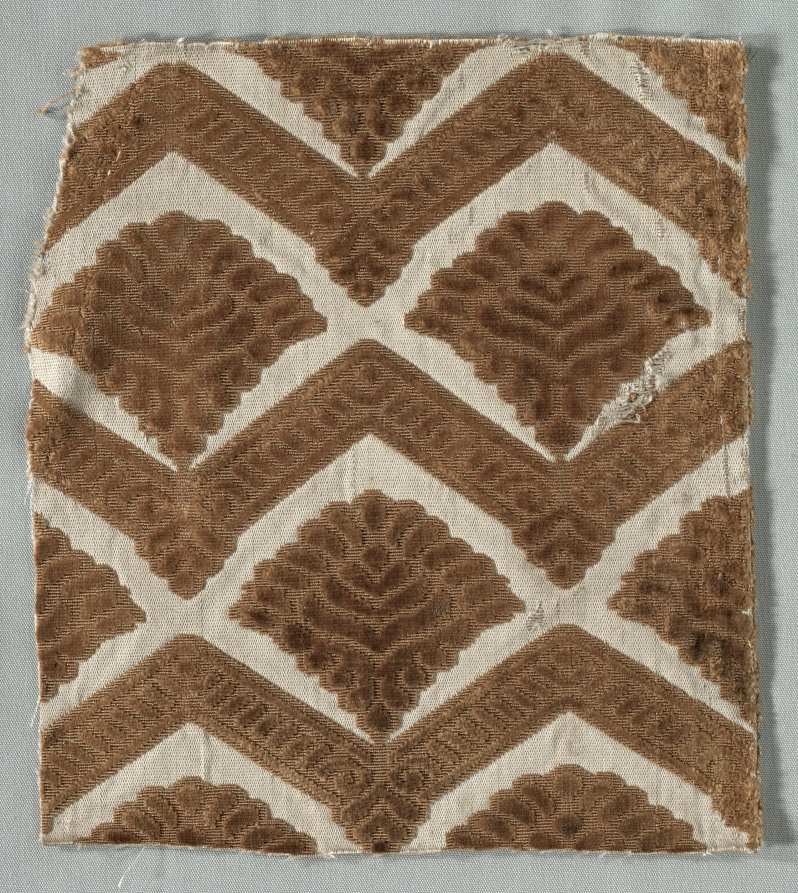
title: Velvet Fragment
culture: Italy, 17th century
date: 1600s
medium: velvet (cut and uncut); silk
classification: Velvet